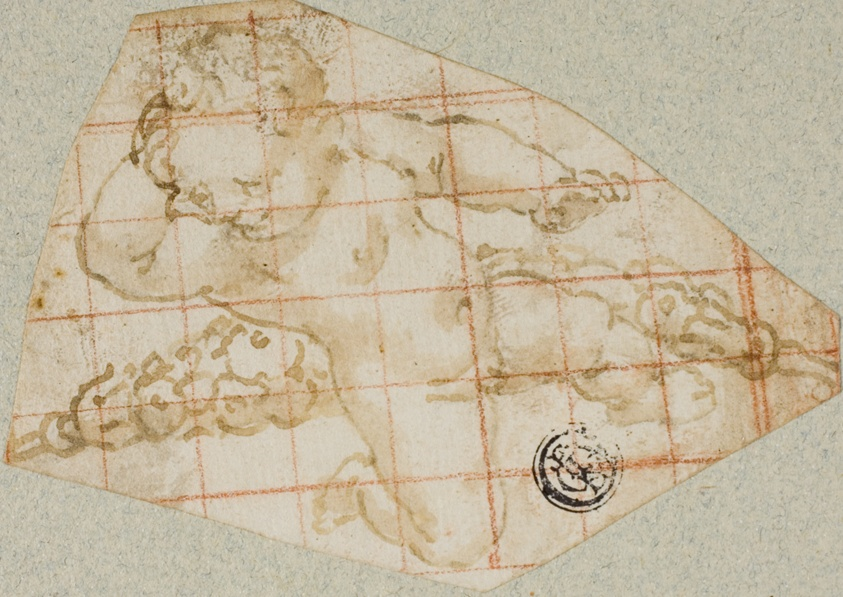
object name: Drawing and Watercolor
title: Putto with Garland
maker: Andrea Lilio (Italian, 1555-1642)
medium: Pen and brown ink with brush and brown wash, squared in red chalk, on ivory laid paper, laid down on blue laid paper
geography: Italy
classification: drawings (visual works); prints and drawing